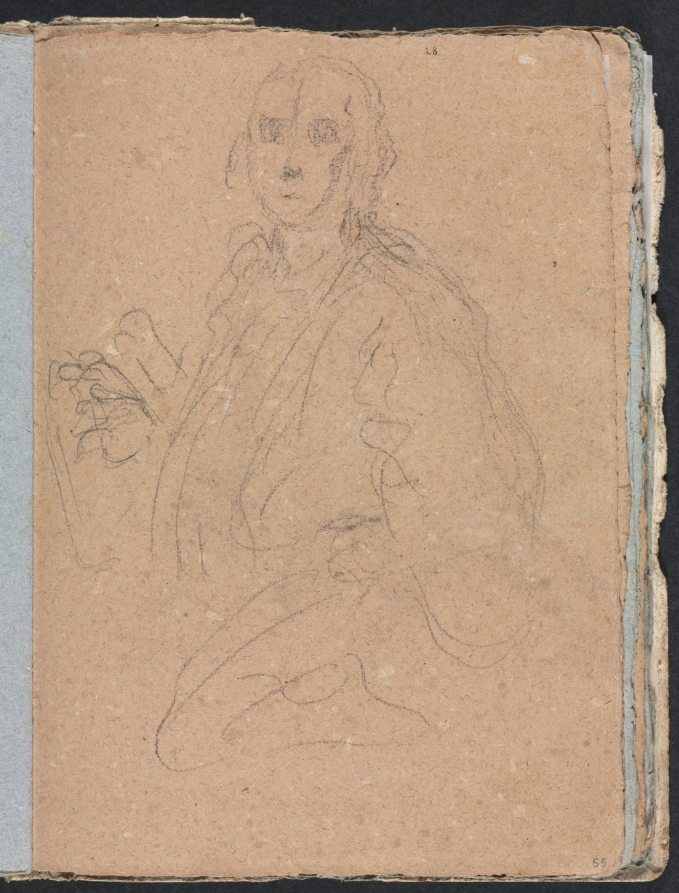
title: Verona Sketchbook: Gentlemen (page 55)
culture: Italy, 18th century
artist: Francesco Lorenzi (Italian, 1723–1787)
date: 1760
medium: black chalk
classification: Bound Volume